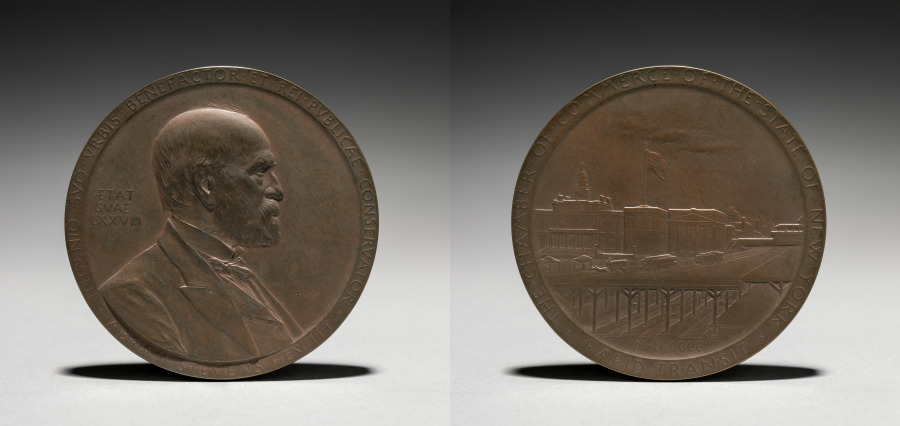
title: Medal: Abram Stevens Hewitt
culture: France, late 19th-early 20th century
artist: Louis-Oscar Roty (French, 1846–1911)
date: 1875–1925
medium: bronze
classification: Metalwork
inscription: obverse - "INGENIO . SVO . VRBIS . BENEFACTOR . ET . REI . PVBLICAE . CONSERVATOR . ABRAM STEVENS HEWITT"; left of portrait bust: "AETAT/SVAE/LXXVIII"; right of portrait bust: "© Roty." On edge: "Tiffany & Co." reverse - band of lettering around edge: "RAPID TRANSIT -- THE CHAMBER OF COMMERCE OF THE STATE OF NEW YORK, MDCCCC. On edge: "Tiffany & Co."